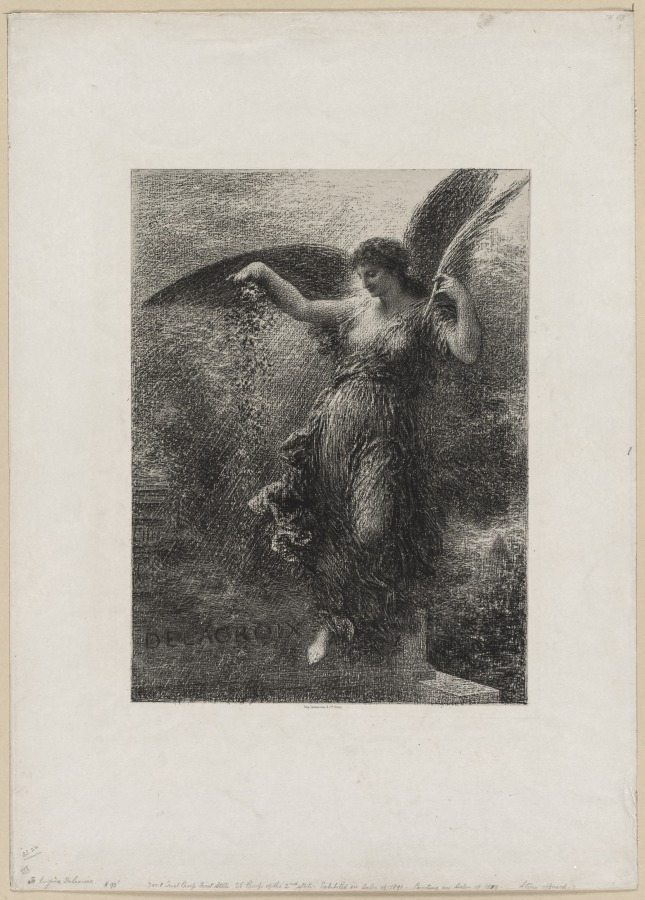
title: À Eugene Delacroix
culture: France, 19th century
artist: Henri Fantin-Latour (French, 1836–1904)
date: 1890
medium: lithograph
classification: Print